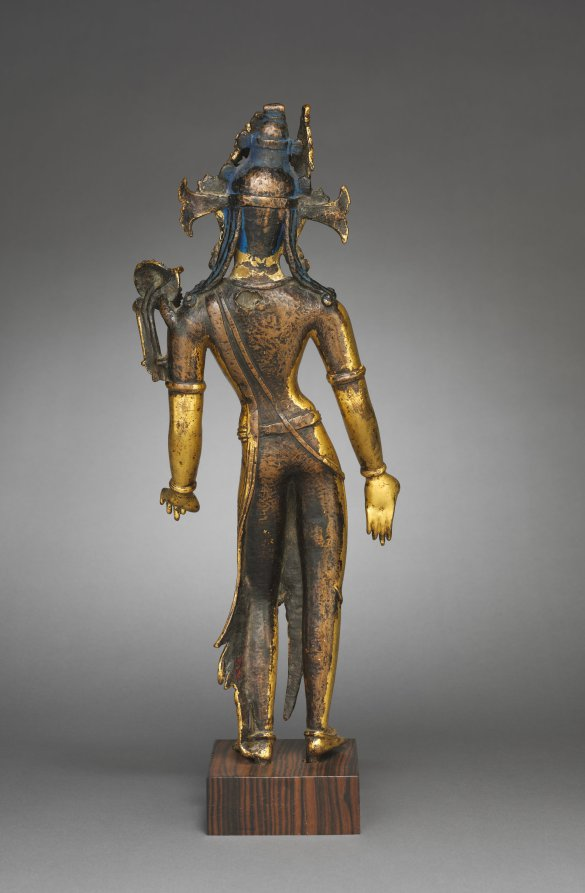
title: Bodhisattva of Wisdom (Manjushri)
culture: Nepal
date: 1400s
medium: gilded copper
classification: Sculpture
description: The youthful, princely form of Manjushri can be identified by the horizontal book on the lotus over his left shoulder. The book refers to the Buddhist teachings of ultimate knowledge (Prajnaparamita), and this bodhisattva is the male embodiment of the wisdom gained from understanding them. Manjushri is of special importance for Buddhists of Nepal, called Newari, who credit him with draining the water from Kathmandu Valley.